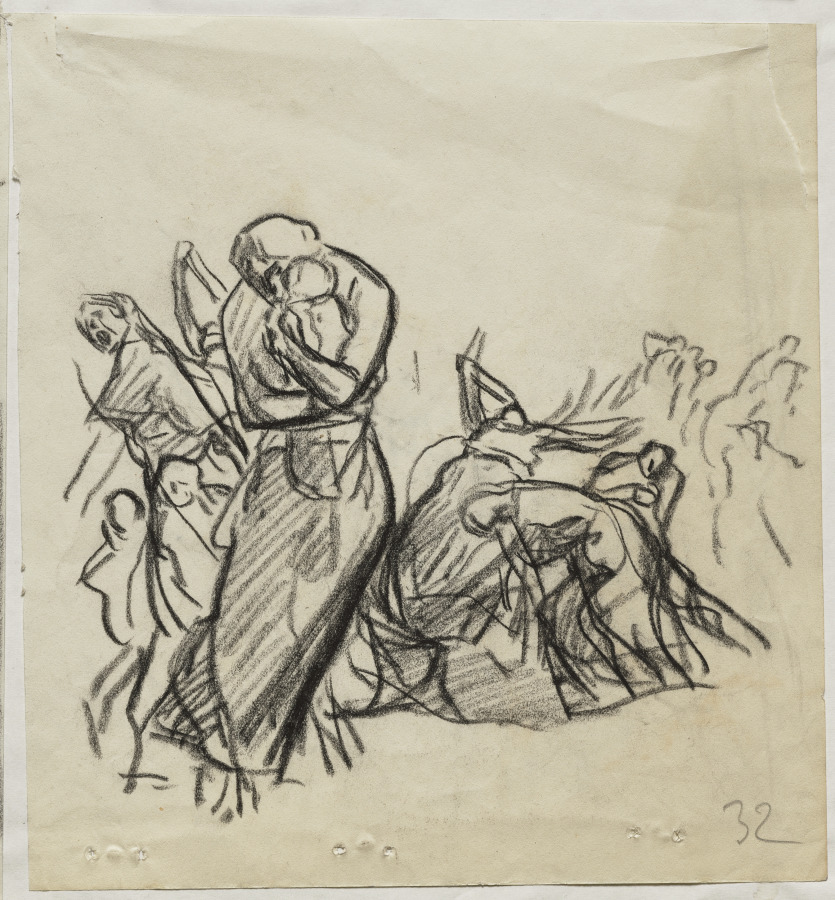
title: L'Incendie de Louvain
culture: France, 20th century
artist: Auguste Louis Lepère (French, 1849–1918)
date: 1914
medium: pen and brush and black ink with white highlights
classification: Drawing